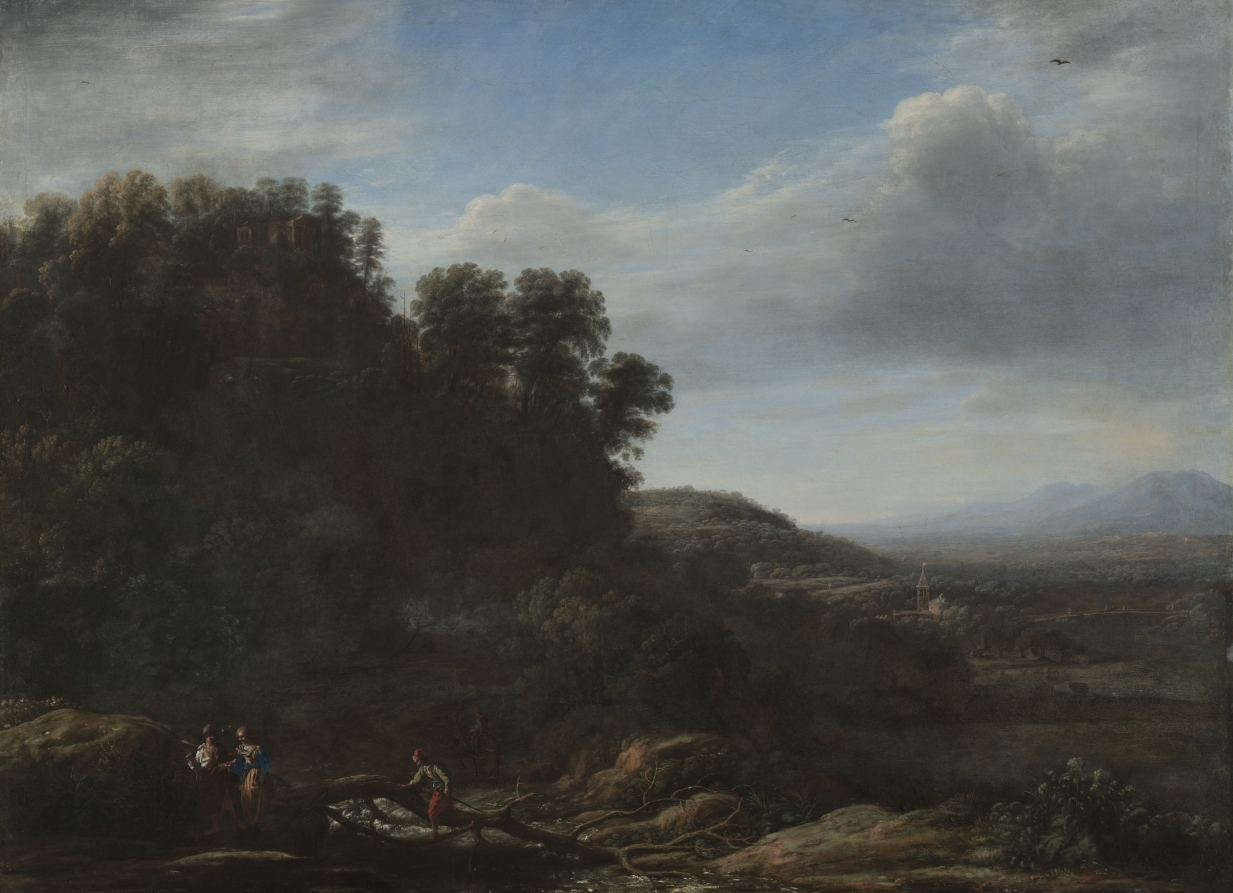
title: Italian Landscape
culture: France, 17th century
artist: Claude Lorrain (French, 1604–1682)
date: c. 1630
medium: oil on canvas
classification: Painting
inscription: signed lower right: CLAUDIO I.V. 163...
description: Although French by birth, Claude Lorrain spent his entire working career in Rome. He revolutionized the art of landscape painting by filling his harmoniously ordered scenes (inspired by the campagna, the countryside around Rome) with a golden, hazy light. Painted early in Lorrain's career, Italian Landscape shows a wide, sweeping vista with a wooded hill topped by a structure resembling an ancient Roman temple. The left side of the picture is dark, but the foreground sweeps away in a curve to the right that leads off into an increasingly luminous distance.